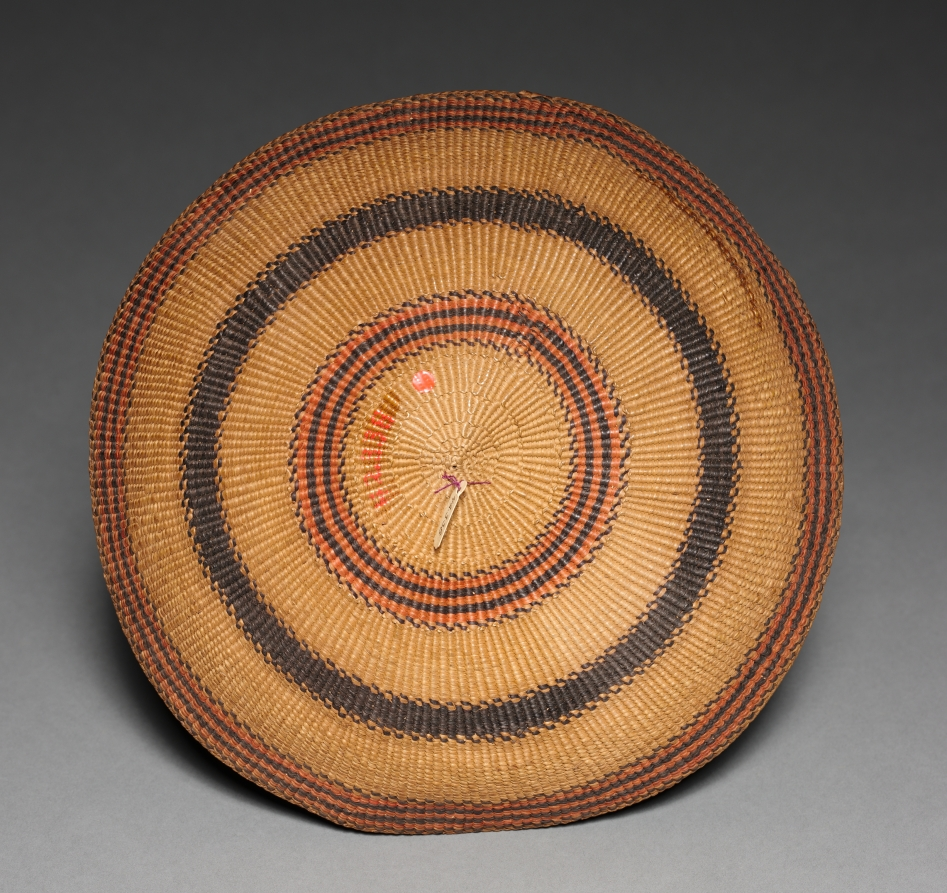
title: Twined Bark Tray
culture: Northwest Coast, Tlingit, late 19th century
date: late 1800's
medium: twined bark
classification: Basketry